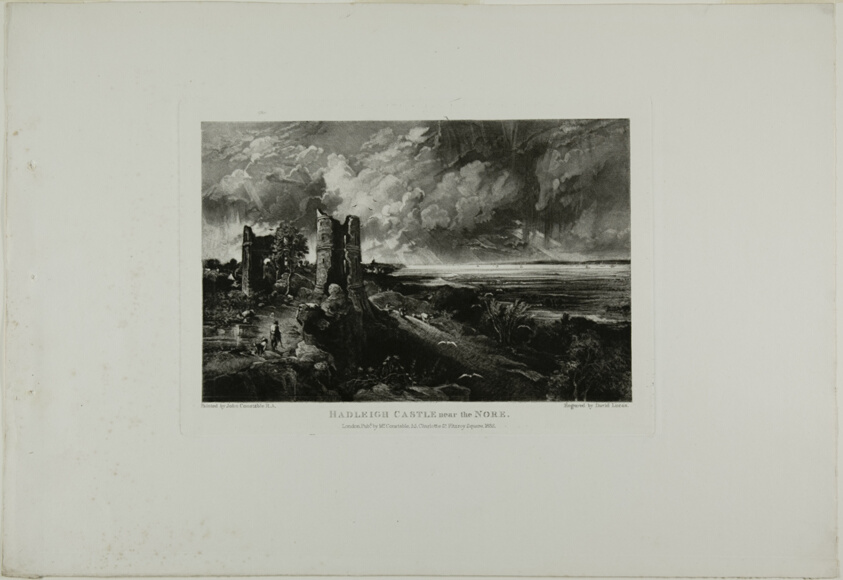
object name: Print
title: Hadleigh Castle Near the Nore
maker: David Lucas (English, 1802-1881); after John Constable (English, 1776-1837)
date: 1831–32, published 1832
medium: Mezzotint in black ink on heavy ivory wove paper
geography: England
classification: mezzotint; print; prints and drawing